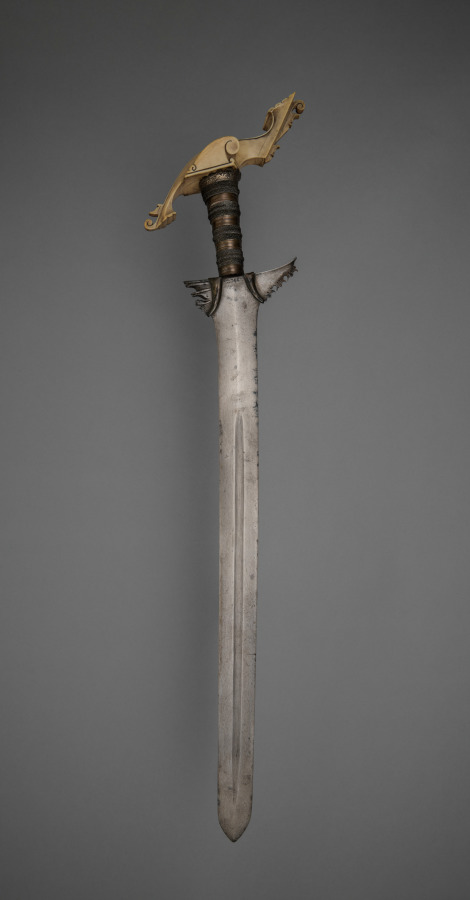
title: Sword (Kalis or Sundang)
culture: Philippines, Mindanao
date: before 1916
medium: Blade: metal; grip: brass ferrule and silver wire; pommel: ivory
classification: Arms and Armor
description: This sword features a long kalis blade with a straight profile and deep fuller running nearly the entire length. The hilt terminates in an enormous ivory pommel, a prestige marker associated with high-ranking ownership in the Sulu and Lake Lanao regions. The commanding blade, functional and symbolic clamps, silver-braided grip, and pommel identify this as an exceptional example of elite Moro weaponry used among the Tausug or Maranao groups in the southern Philippines.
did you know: The asang-asang (fish gill) clamps at the blade’s base stabilize it while referencing the purifying quality attributed to fish gills.